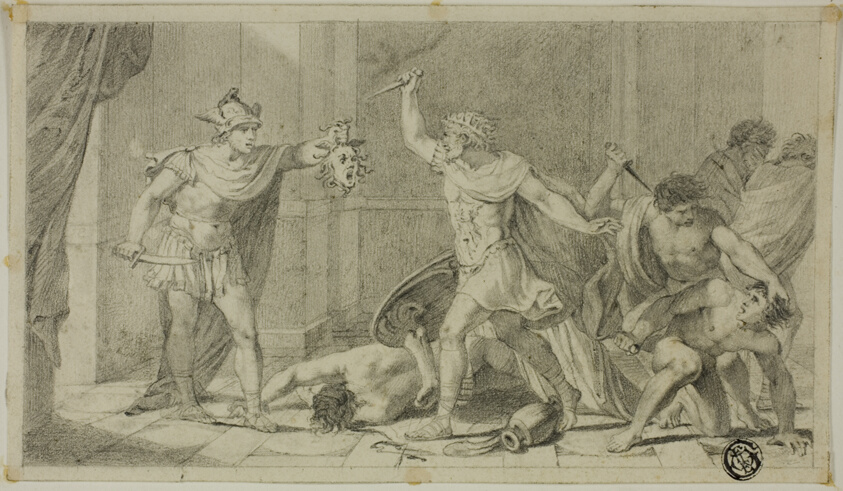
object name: Drawing and Watercolor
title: Perseus Confronting Phineas and his Followers with Head of Medusa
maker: Unknown Artist; French, 1700-1799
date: 18th century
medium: Black chalk, on cream wove paper, tipped onto ivory wove paper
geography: France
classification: graphite; drawings (visual works); prints and drawing